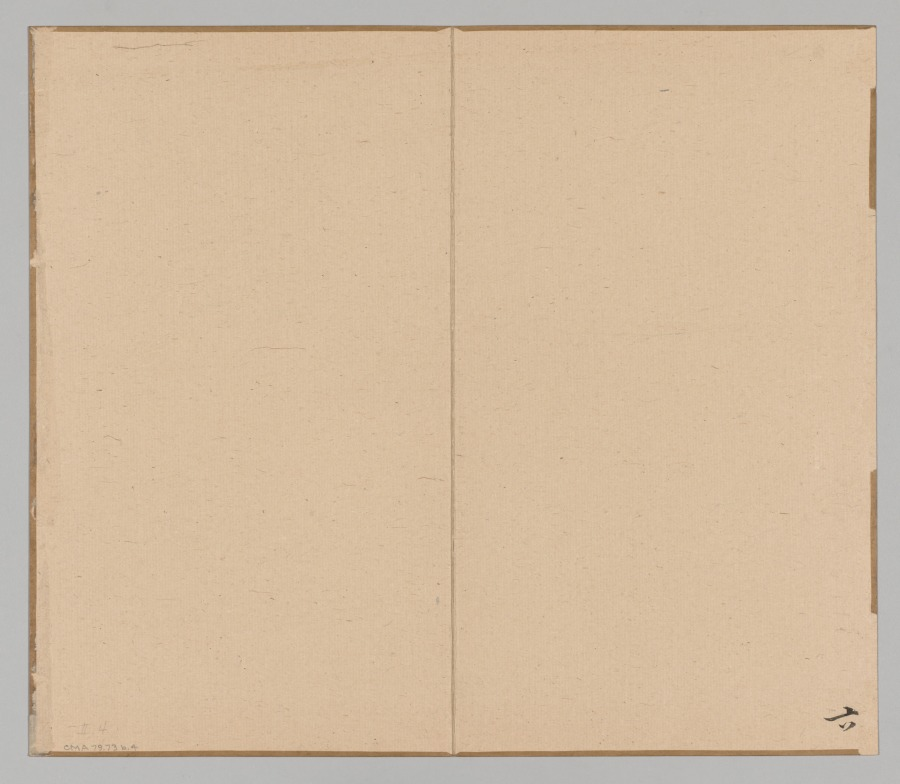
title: Reverberations of Taiga, Volume 2 (leaf 4)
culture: Japan, Edo period (1615–1868)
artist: Aoki Shukuya (Japanese, d. 1802)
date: mid- to late 1700s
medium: double-leaf from a pair of albums; ink and light color on paper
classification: Portfolio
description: Traditionally, young painters in Japan began their studies with an established master-painter. The master's compositions invariably became models that the apprentice copied to learn various ink and brush techniques. Shukuya was a pupil of the famous Kyoto artist Ikeno Taiga, whose style is reflected in these sketches of rocks, trees, and mountains.